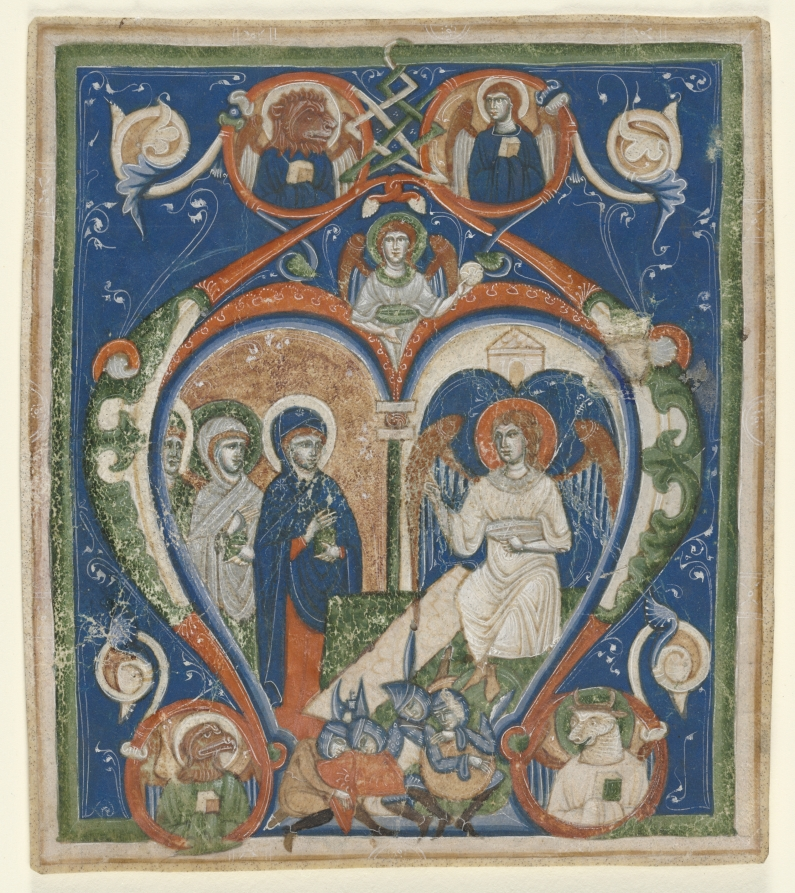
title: Initial A[ngelus Domini descendit] from an Antiphonary: The Three Marys at the Tomb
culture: Italy, Siena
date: c. 1280–1300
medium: ink, tempera, and gold on parchment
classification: Manuscript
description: This large initial A introduces the matins (about 2:30 a.m.) response for Easter: Angelus Domini descendit de celo (An angel of the Lord descended from heaven). The letter that begins the text is commonly and appropriately decorated with a depiction of this Easter morning event. The three holy women known as "the three Marys" (Mary Magdalene; Mary, the mother of James; and Salome) are shown approaching Jesus's tomb with jars of spice to anoint the body. They are met by an angel in dazzling white robes who announces that Christ has risen. The angel's wand tipped with a fleur-de-lys indicates that he is Gabriel. Below are the sleeping soldiers sent by Pilate to guard the tomb.